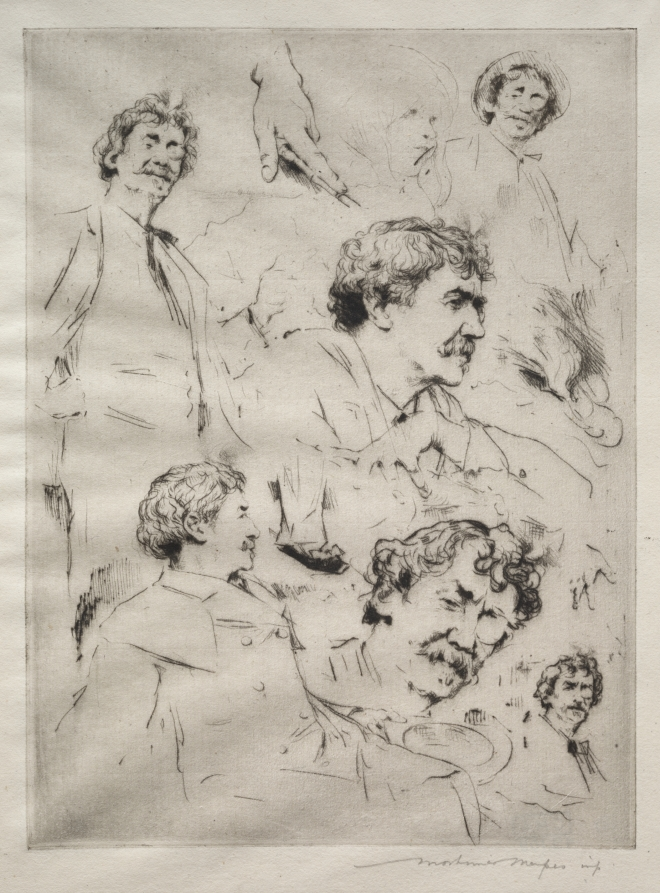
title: James MacNeill Whistler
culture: England, 19th-20th century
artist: Mortimer Menpes (British, 1860–1938)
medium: drypoint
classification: Print